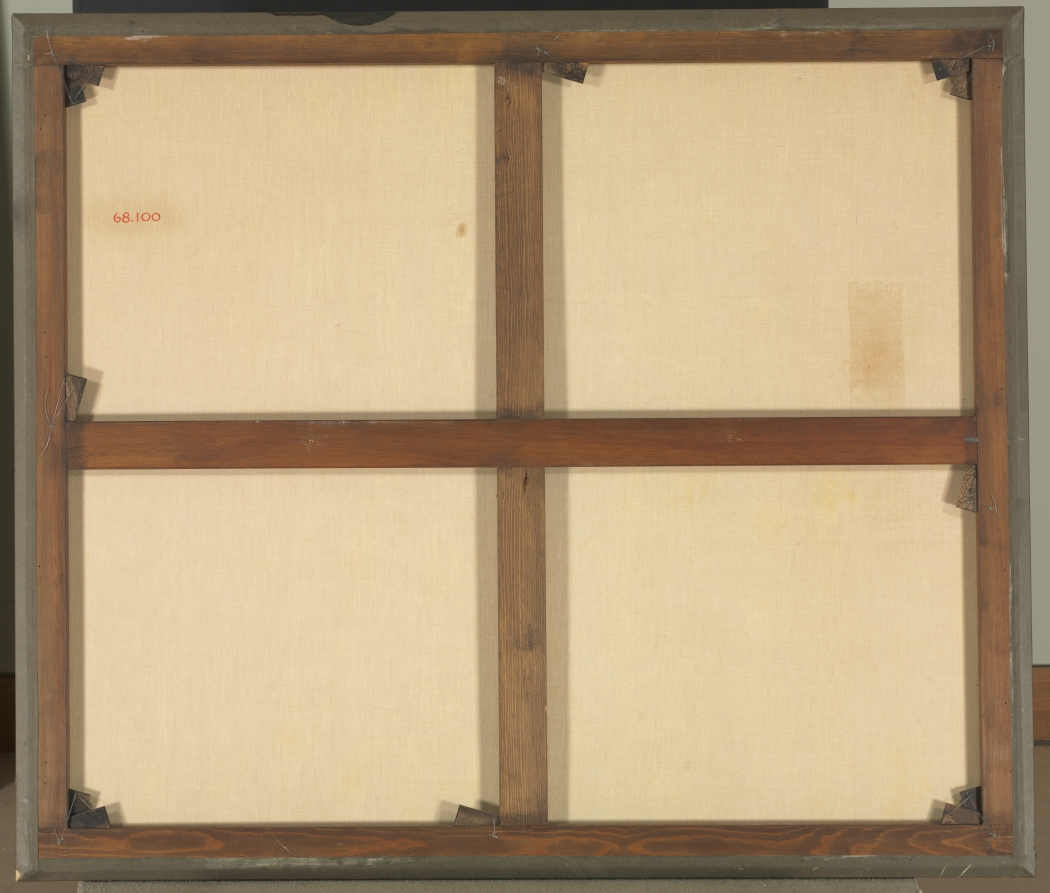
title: Adoration of the Shepherds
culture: Italy, 17th century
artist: Bernardo Cavallino (Italian, 1616–1656)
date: c. 1650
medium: oil on canvas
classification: Painting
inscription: Signed left on ox: "BC [monogram]"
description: Cavallino worked in Naples where he was not well known during his lifetime, but was alert to the work of contemporaries whose innovations he transformed with extraordinary delicacy and charm. The adoration of the shepherds is a traditional subject, but here Cavallino shows it in a new light. The focus is on Mary, indicating that she alone is aware of the angels who flutter above with ribbons proclaiming Gloria in Excelsis Deo (Glory to God in the highest). Joseph and the shepherds stolidly regard the child, but the sweetness of Mary's expression simultaneously reveals her love, pride, and humility.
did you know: The artist signed this painting with his monogram “BC” on the rump of the ox.